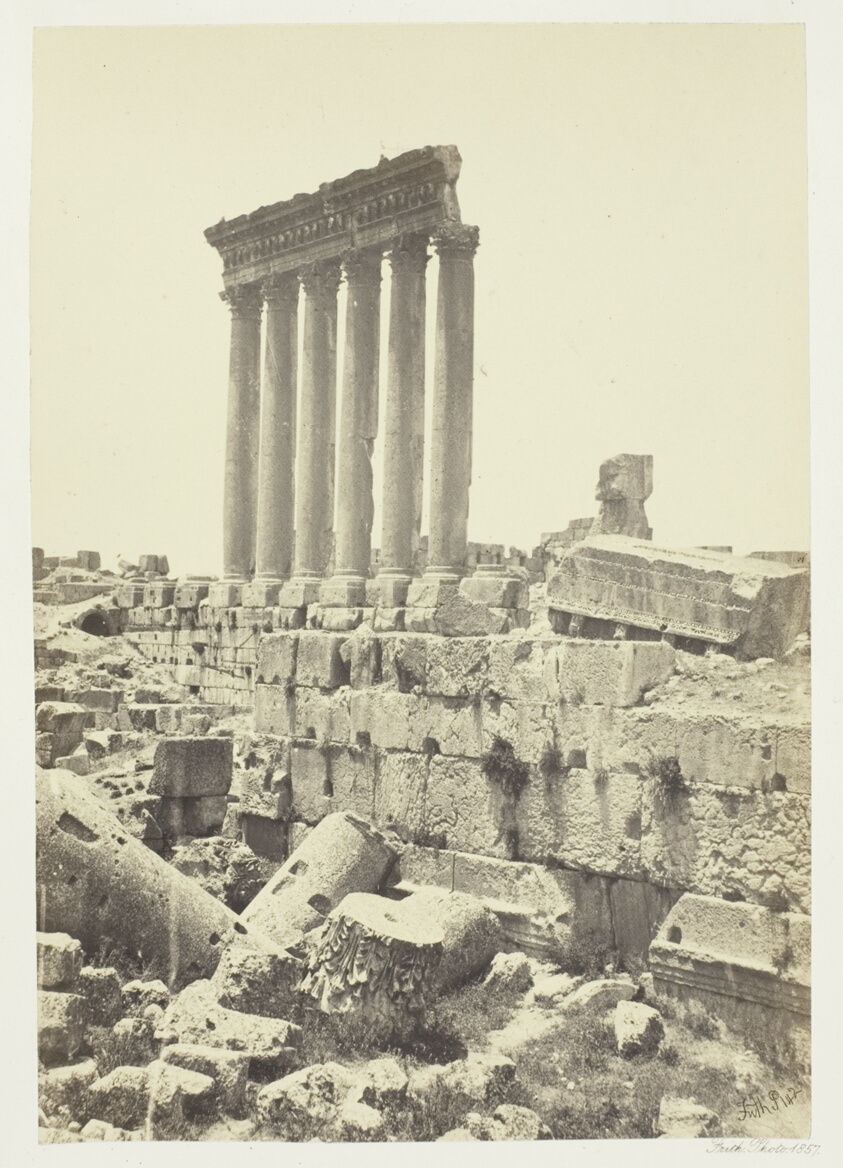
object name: Photograph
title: The Great Pillars at Baalbec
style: 19th century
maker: Francis Frith (English, 1822–1898); published by James S. Virtue (English, 1829–1892)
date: 1857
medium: Albumen print, pl. 23 from the album "Egypt and Palestine, Volume I" (1858)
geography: England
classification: photograph; albumen silver print; photography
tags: Collected by Hugh Edwards, Egypt and Palestine